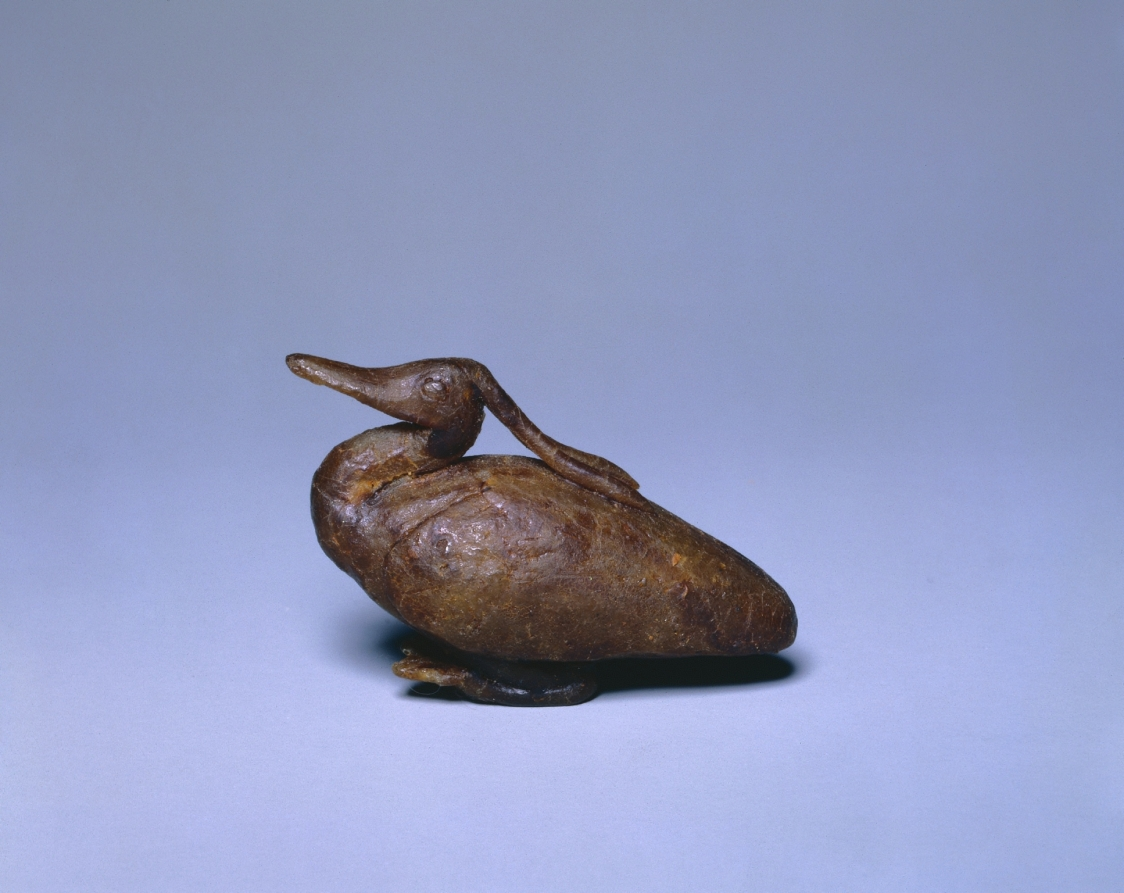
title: Benu-bird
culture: Egypt, Third Intermediate (1069–715 BCE), Dynasties 21–22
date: 1000–500 BCE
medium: honey-colored wax with dark amber varnish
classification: Funerary Equipment